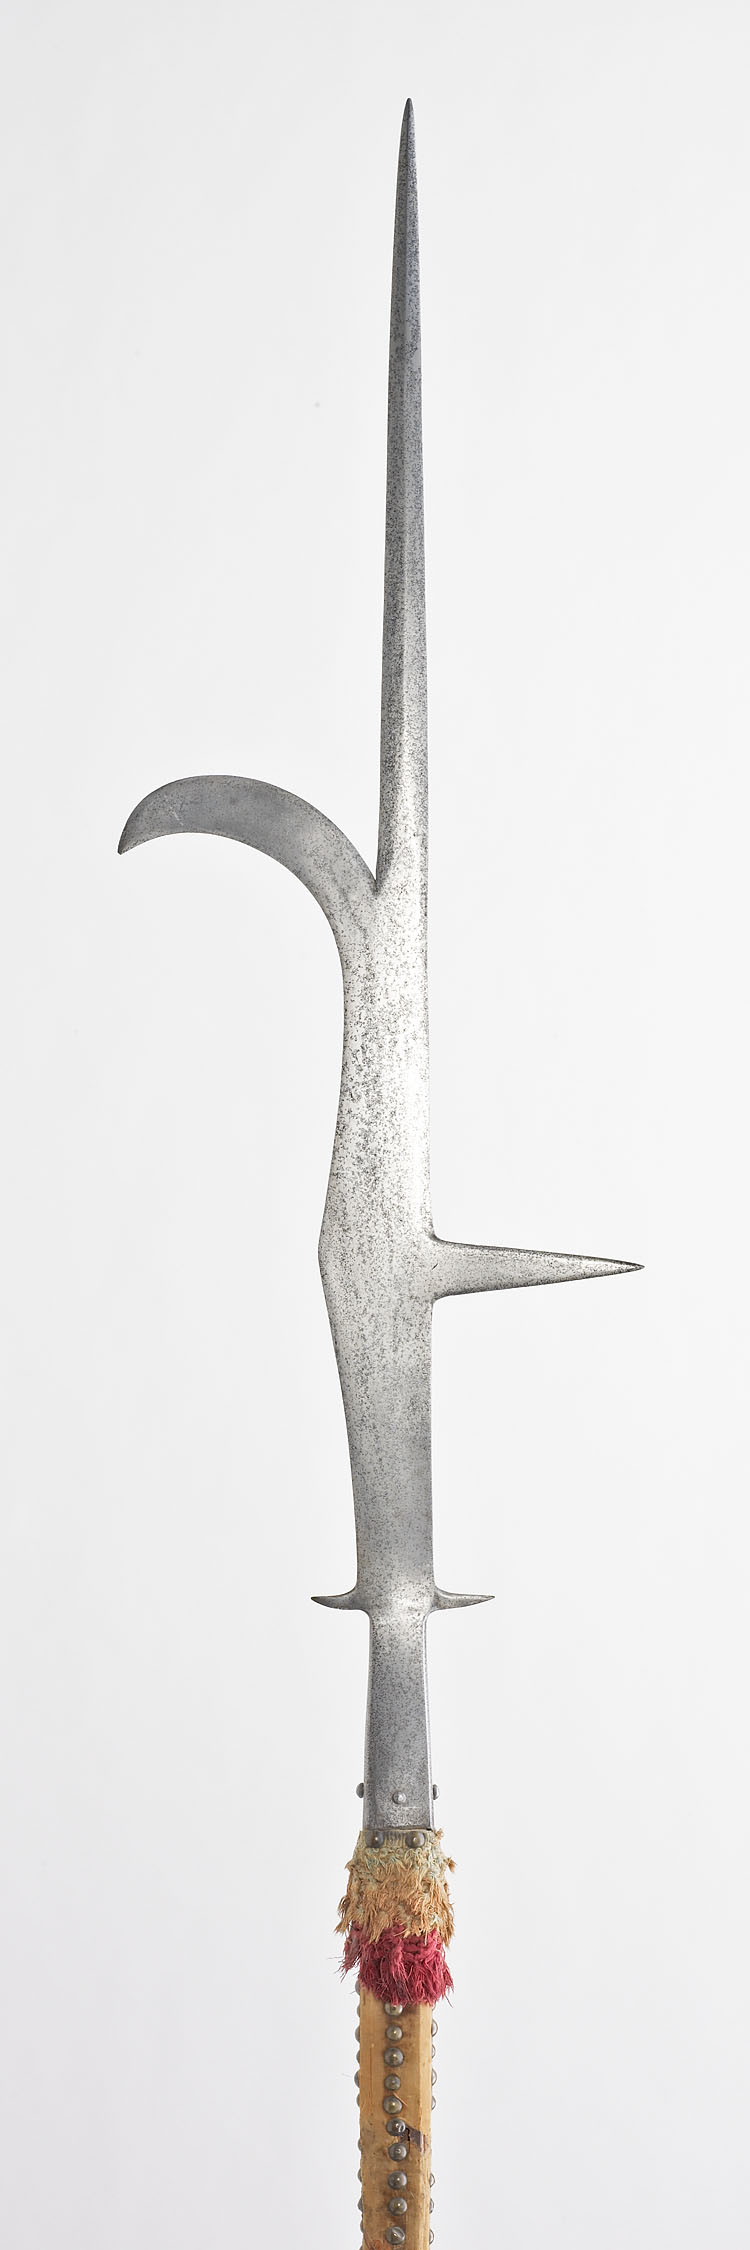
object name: Arms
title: Bill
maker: Italian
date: 1505/15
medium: Steel, wood (pine), velvet, attached tassel, and gilded iron nails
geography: Italy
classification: edged weapon-staff; arms; arms and armor